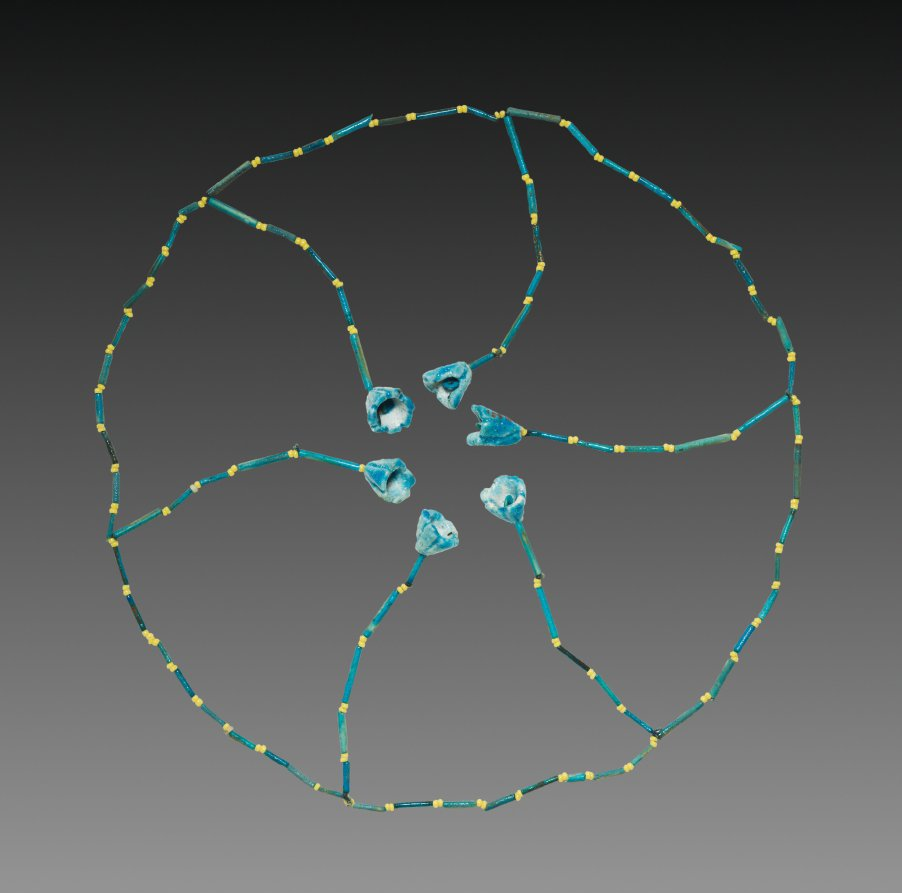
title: Necklace with Lotus Pendants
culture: Egypt, elements of various periods, but arrangement is modern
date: 20th Century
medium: blue faience and glass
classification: Jewelry